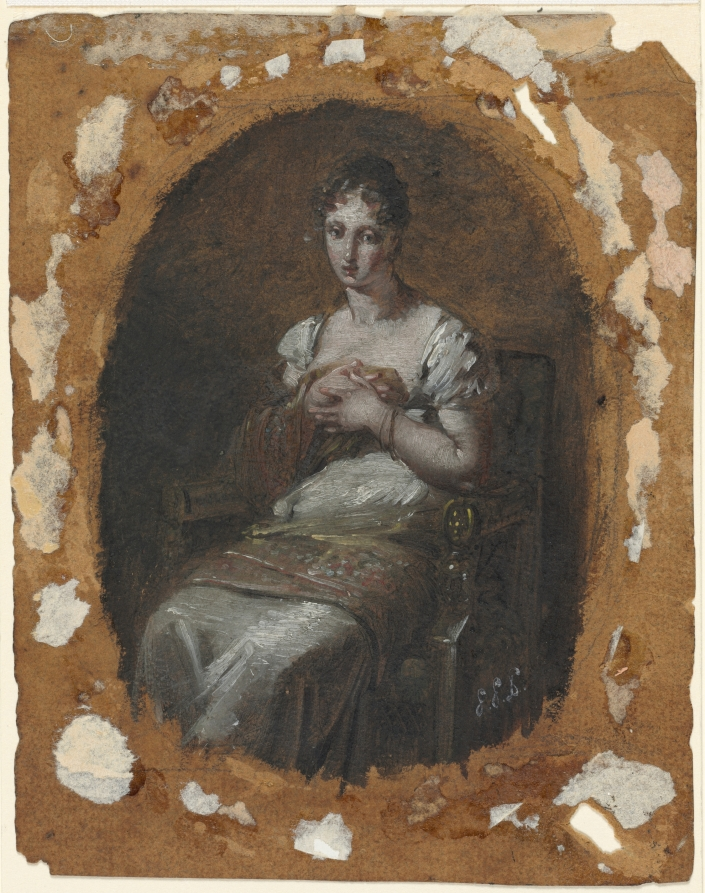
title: Young Woman Seated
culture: France, late 18th-early 19th Century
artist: Pierre-Paul Prud'hon (French, 1758–1823)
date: last fourth 18th century or first fourth 19th century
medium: oil; framing lines in graphite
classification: Drawing